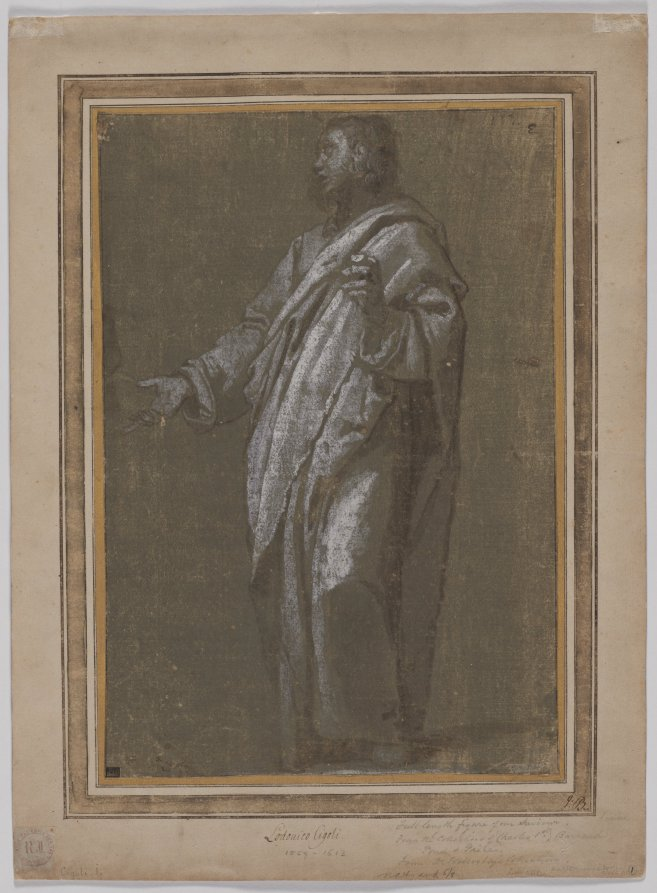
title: Standing Male Figure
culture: Italy, 17th century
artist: Ludovico Cardi Cigoli (Italian, 1559–1613)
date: c. 1610/13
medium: brush and brown ink, heightened with white paint; framing lines in brown ink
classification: Drawing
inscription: [by Lanière?, see catalogue of Bateson sale], lower left, in brown ink: Cigoli ; upper right, in graphite: 112 ; upper right, in brown ink: E ; SECONDARY SUPPORT, lower center, in brown ink: Lodovico Cigoli. ; lower left, in graphite: Cigoli, l. ; lower center, in graphite: 1559 - 1613 ; lower right, in graphite: Full length figure of our Savior . / From the Collections of [Charles 1st.,] [brackets part of inscription; st from 1st in superscript] Barnard. / Pond & Price. / From Dr. Wellesley's Collection . ; lower right, in graphite: mat. wd 5/8 ; lower right, in graphite: double cream ; lower right, in graphite: [illegible] inside 3 mm. / [illegible] ; lower right, in graphite: 1. [circled] ; VERSO OF SECONDARY SUPPORT, lower right, in brown ink: the 8th night / Lot 52 ; upper left, in graphite: 1183 [underlined] ; upper left, in graphite: Collections ; lower right, in graphite: 45